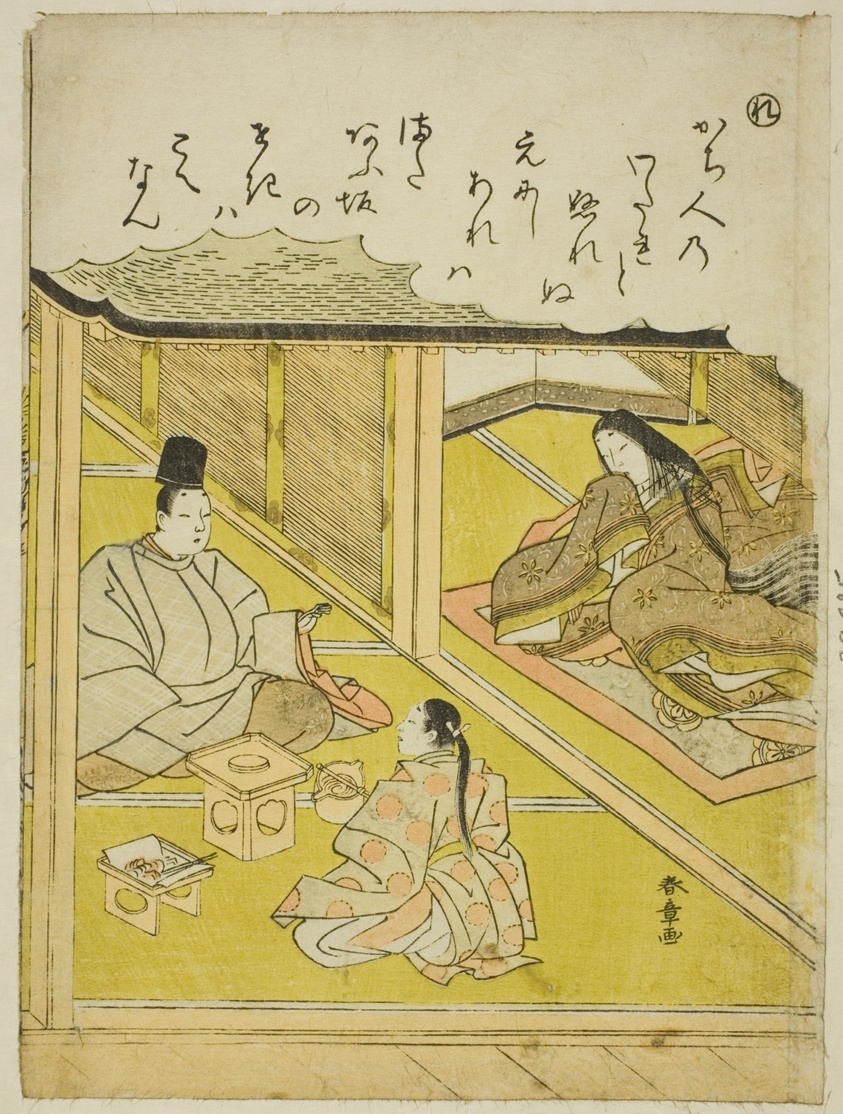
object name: Print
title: "Re": The Imperial Huntsman, from the series "Tales of Ise in Fashionable Brocade Pictures (Furyu nishiki-e Ise monogatari)"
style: Japanese (culture or style)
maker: Katsukawa Shunsho 勝川 春章; Japanese, 1726-1792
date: c. 1772/73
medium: Color woodblock print; koban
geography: Japan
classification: woodblock print; print; asian art